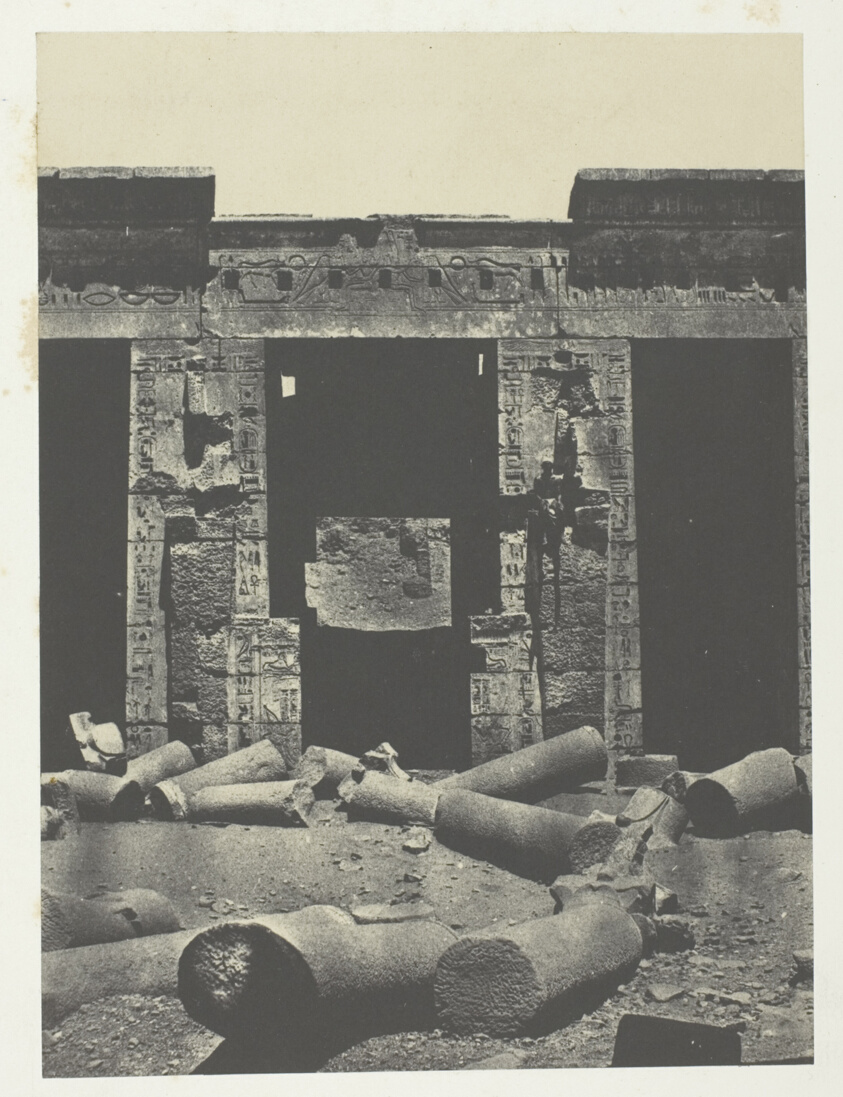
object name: Photograph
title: Médinet-Habou, Partie Orientale du Péristyle du Palais de Ramsès-Méiamoun; Thèbes, plate 51 from the album "Egypte, Nubie, Palestine et Syrie" (1852)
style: 19th century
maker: Maxime Du Camp (French, 1822–1894)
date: 1849/51, printed 1852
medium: Salted paper print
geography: France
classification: salted paper print; photographic process; photography; photograph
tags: Collected by Hugh Edwards, Egypte, Nubie, Palestine et Syrie